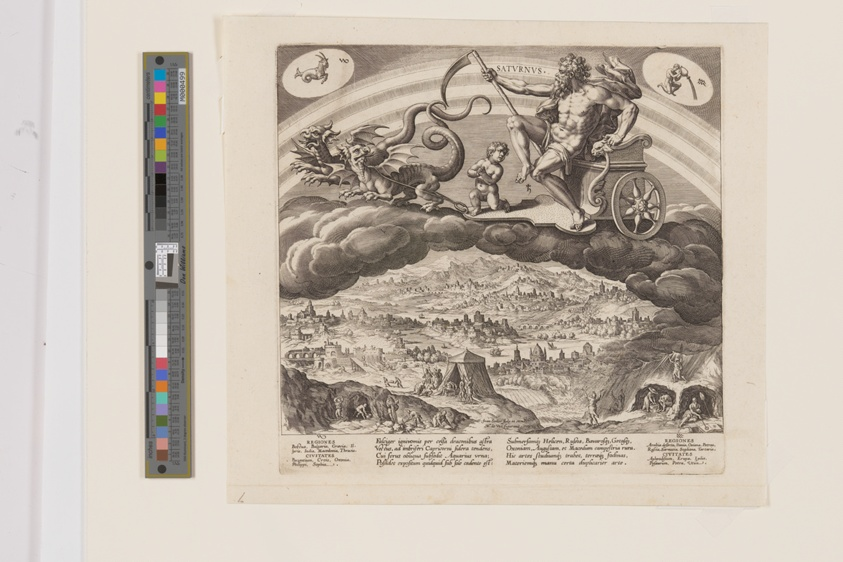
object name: Print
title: Saturnus, from The Seven Planets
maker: Jan Sadeler I (Flemish, 1550–1600); after Maarten de Vos (Flemish, 1532–1603)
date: 1585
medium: Engraving on ivory laid paper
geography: Flanders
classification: engraving; paper; print; prints and drawing